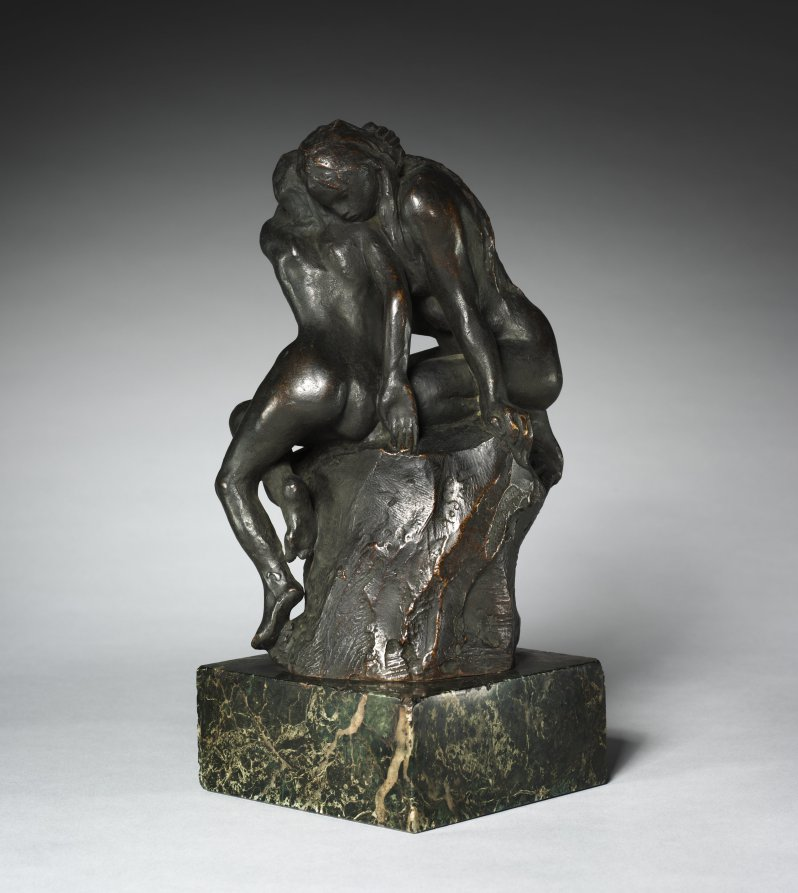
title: Young Girl Confiding Her Secret to Isis (Jeune fille confiant son secret à Isis)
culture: France, 19th century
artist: Auguste Rodin (French, 1840–1917)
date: 1899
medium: bronze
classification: Sculpture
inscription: Inscribed in area below larger figure's left hand and smaller figure's right hand: "Rodin"; below feet of larger figure: "L. Persinka, Fondeur, Versailles"